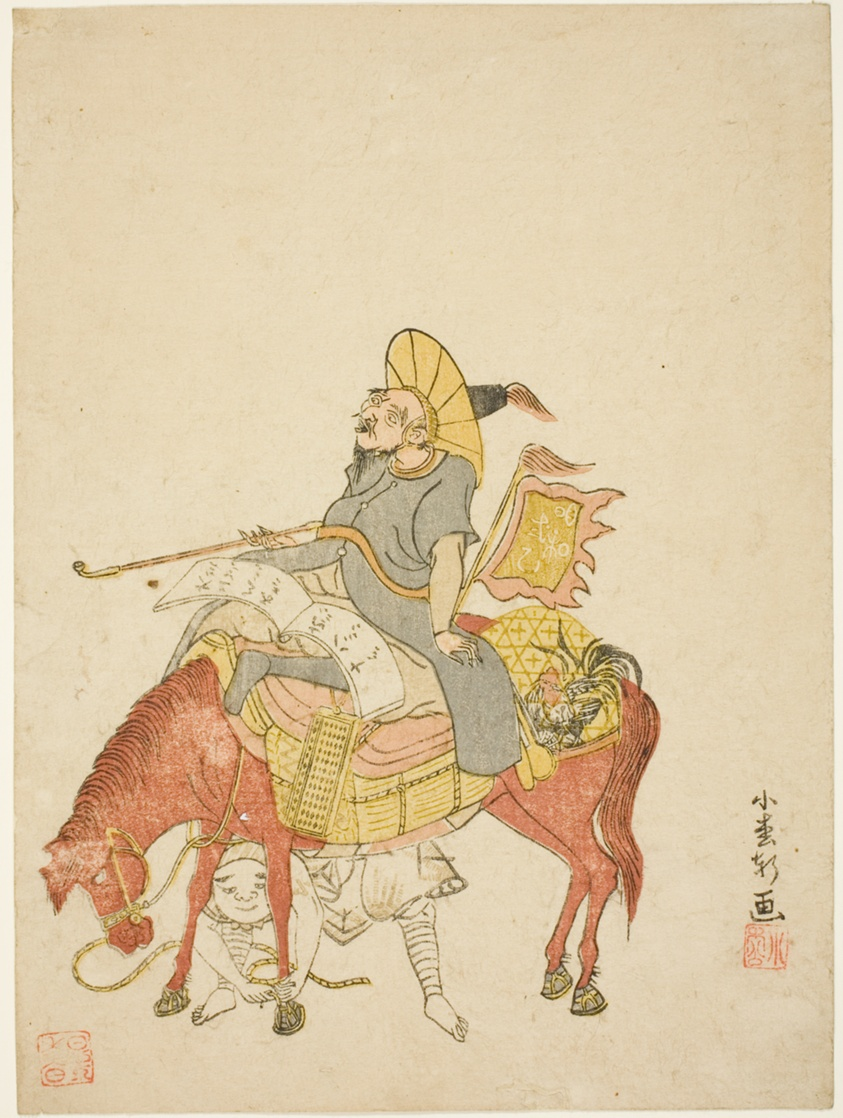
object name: Print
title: The “Chinese” Quartermaster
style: Japanese (culture or style)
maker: Komatsuya Hyakki (Japanese, 1720–1793 (?))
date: 1765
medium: Color woodblock print; chuban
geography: Japan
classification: woodblock print; print; asian art